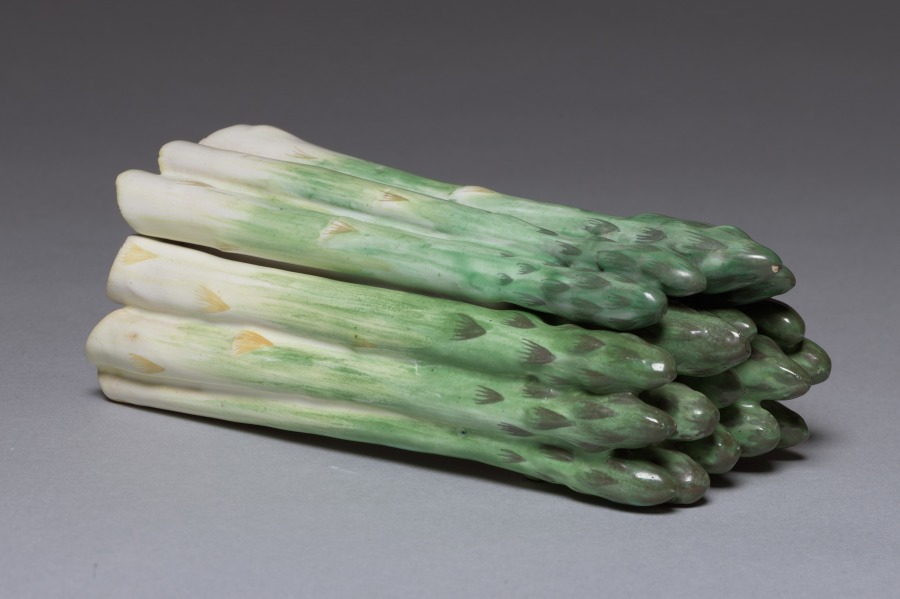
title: Box in the Form of Asparagus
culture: France, Sceaux(?), 18th century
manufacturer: probably by Sceaux Factory (French, active 1748–66)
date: c. 1765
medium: tin-glazed earthenware (faience) with enamel decoration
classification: Ceramic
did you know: Placed upon the dinner table, this container's lid might be lifted to reveal steaming asparagus. Imagine a wealthy 18th-century dining room with flickering candles, whimsical sculptures, and dishes like this decorating the table.